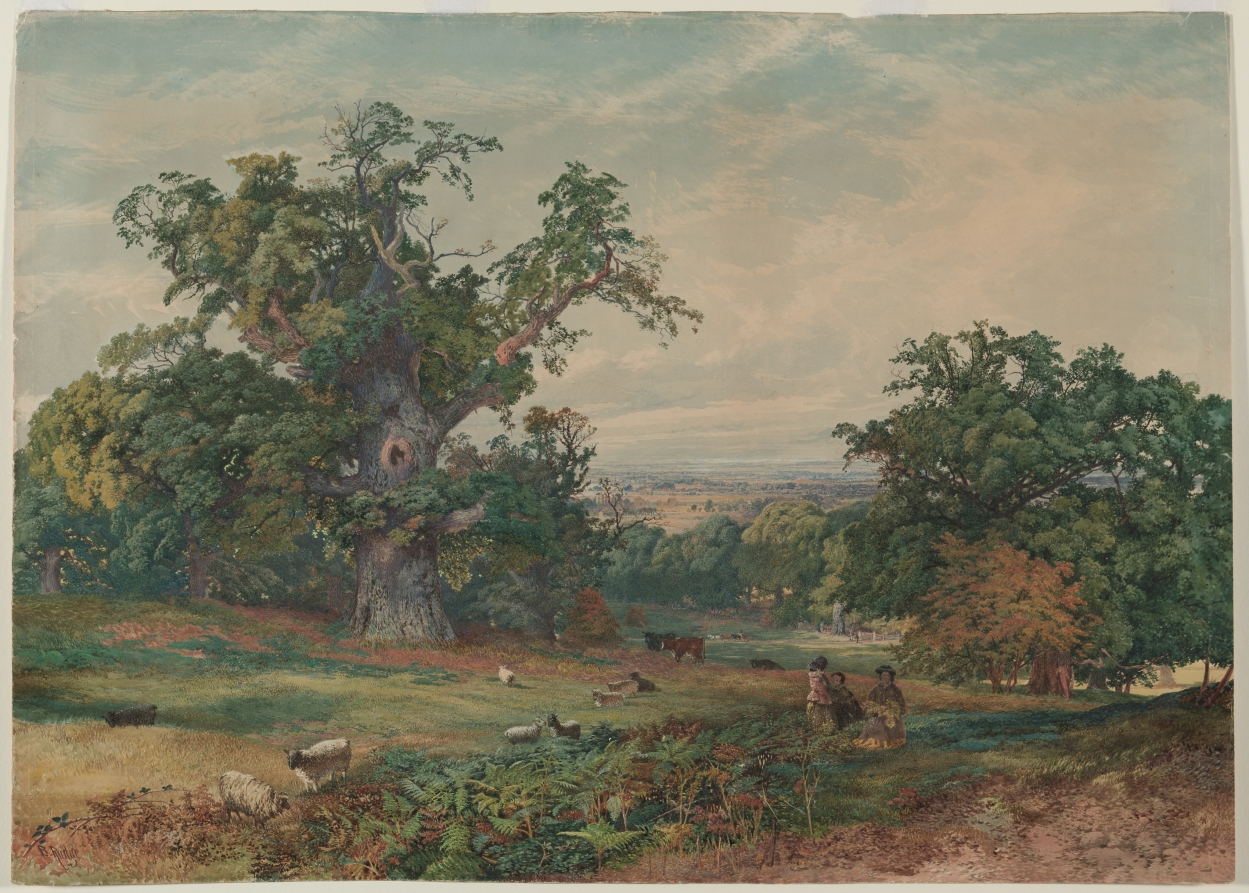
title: View near Bedford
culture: England, 19th century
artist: Bradford Rudge (British, 1805–1885)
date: c. 1825–85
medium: watercolor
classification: Drawing